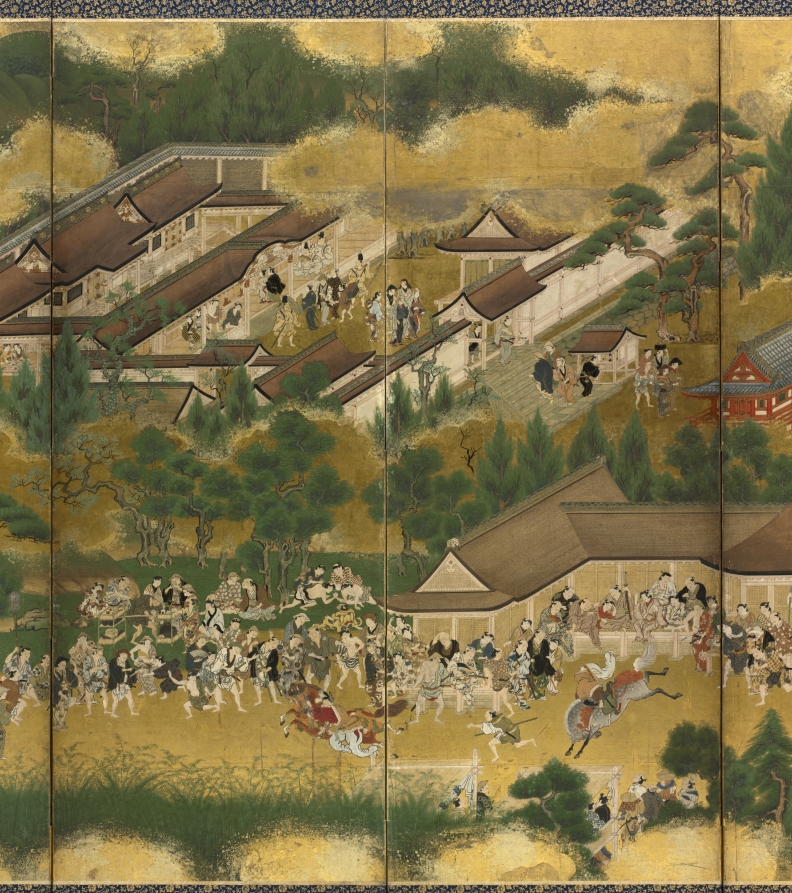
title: Horse Race at the Kamo Shrine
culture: Japan, Edo period (1615–1868)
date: early to mid-1600s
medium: One of a pair of six-panel folding screens; ink and color on gilded paper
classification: Painting